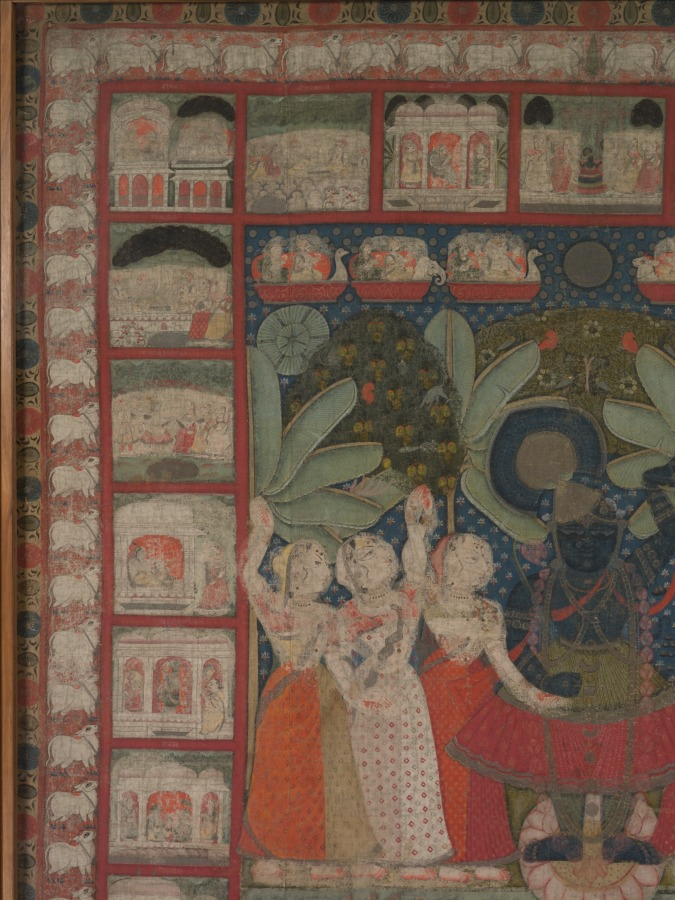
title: Pichvai of Shri Nathji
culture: Northwestern India, Rajasthan, Nathdwara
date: 1825–50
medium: Gum tempera, silver, and gold on cotton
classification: Painting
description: Painted-cloth devotional wall hangings (pichvai) form the backdrop to the worship of Krishna as Shri Nathji. As a result of long-term exposure, these textiles are usually faded and worn. The icon of Krishna as Shri Nathji is the central figure. On either side of him, milkmaids with arms entwined join him in a state of ecstasy. Experiencing the bliss of divine play (lila) with Krishna is the main religious goal for followers of the Pushti Marg sect of Hinduism to which this work belongs. Episodes from the life of Krishna and a border of adoring cows frame the central scene.